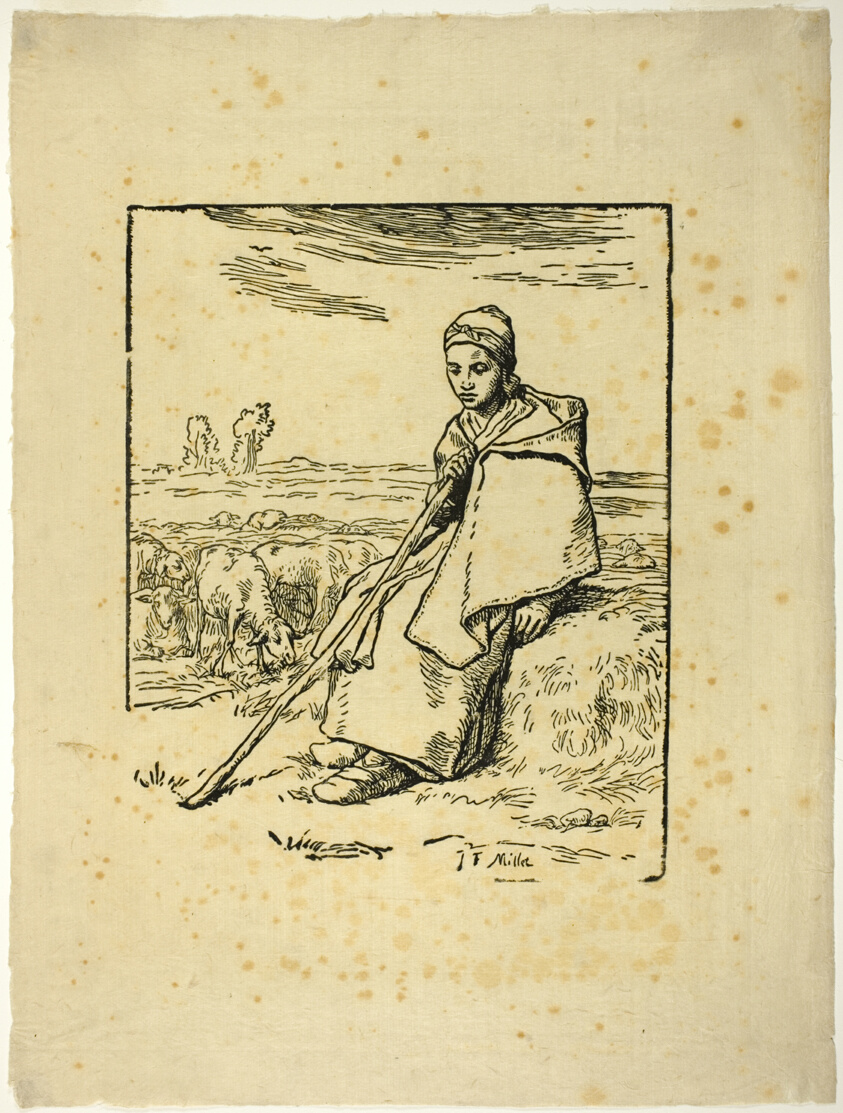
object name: Print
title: The Shepherdess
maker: Jean François Millet (French, 1814-1875)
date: 1863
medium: Woodcut on tan Japanese paper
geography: France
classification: woodcut; print; prints and drawing